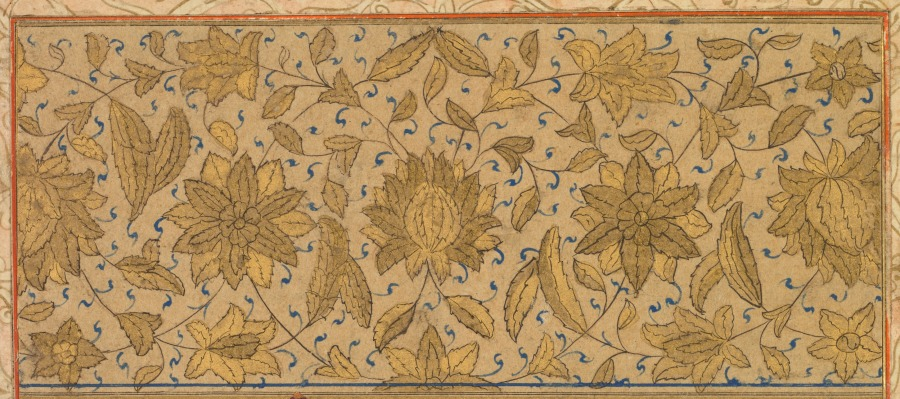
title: Babur receives booty and Humayun’s salute after the victory over Sultan Ibrahim in 1526, from an Akbar-nama (Book of Akbar) of Abu’l Fazl (Indian, 1551–1602)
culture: Mughal India, court of Akbar (reigned 1556–1605)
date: c. 1596–1597 or 1604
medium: Gum tempera and gold on paper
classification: Painting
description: The first Mughal emperor Babur sits enthroned as men bring gifts and sacks of tribute to mark a successful expansion of his territories. Emblematic of his role in leading the victory, his son Humayun wears a wine-and-gold robe of honor despite the Delhi heat in late April. Marking the royal space are a carpet and canopy painted with a lapis lazuli ground. The floral vine motif called arabesque swirls around a central lobed medallion. These delicate patterns are inspired from Persian manuscript illuminations. Contemporary historians describe awnings of gold embroidery, brocade, and velvet along with colorful carpets resembling a beautiful flower bed.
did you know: A clerk records the amount of tribute that Babur received from conquered kings.